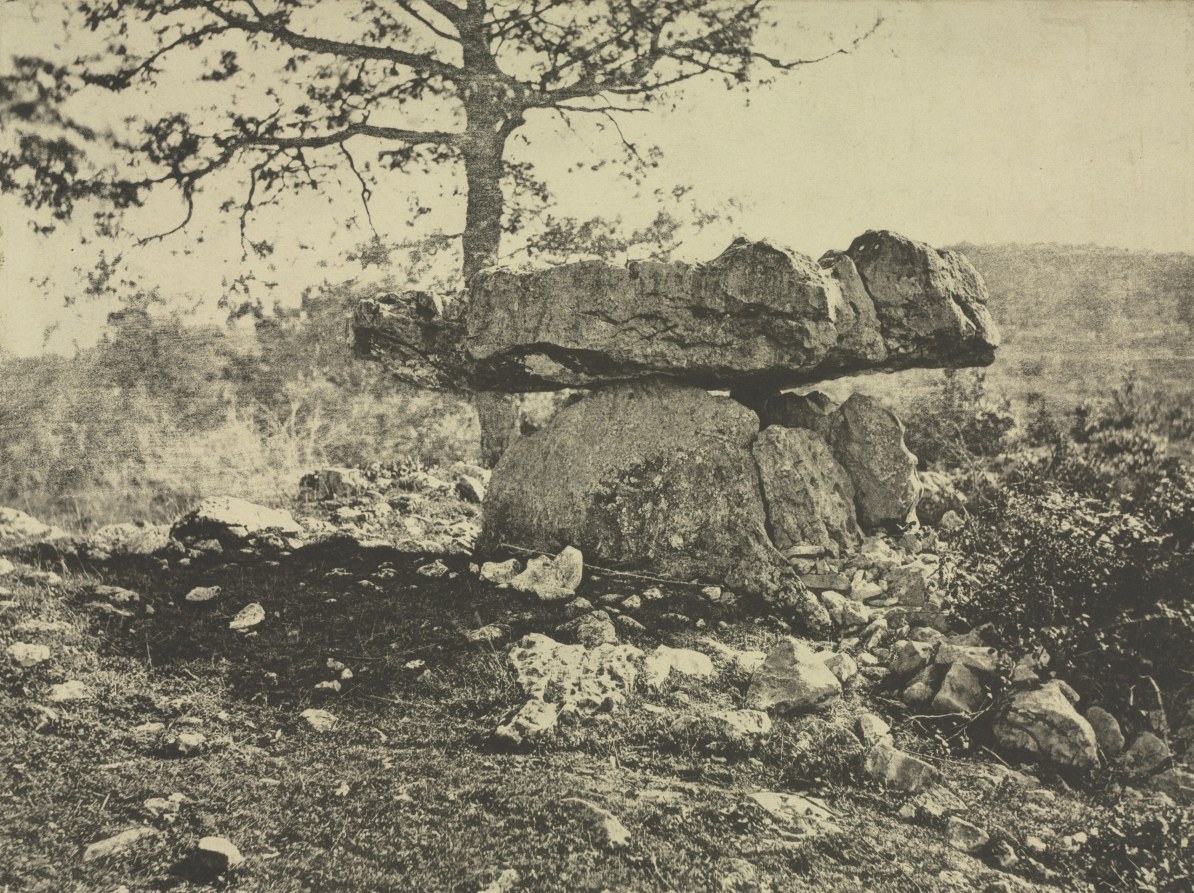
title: Dolmen, Cap del Puetch, Ariège, France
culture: France, 19th century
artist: Arthur A. Taylor (French, active 1850–d. 1873)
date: c. 1865–69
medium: G. Arosa et Cie process print from waxed paper negative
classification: Photograph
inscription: none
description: A British-born photographer, Taylor lived in Marseille and became a member of the Société Française de Photographie in 1860. Taking photographs in city parks and the surrounding countryside, as well as in Ariège and Seine-et-Oise, he often worked with the establishment G. Arosa et Cie in Saint-Cloud to produce his ink-based prints made from photographs according to the publisher’s unique process. This print is likely made from a shellac base, for Taylor wrote several articles for British and American photographic journals on a shellac printing process in 1866 and 1867. After printing, the images would be mounted onto a heavy card stock and sold to be collected in albums. Here, the subject, a dolmen, or Neolithic tomb, reflects 19th-century interest in distant history and early monuments.